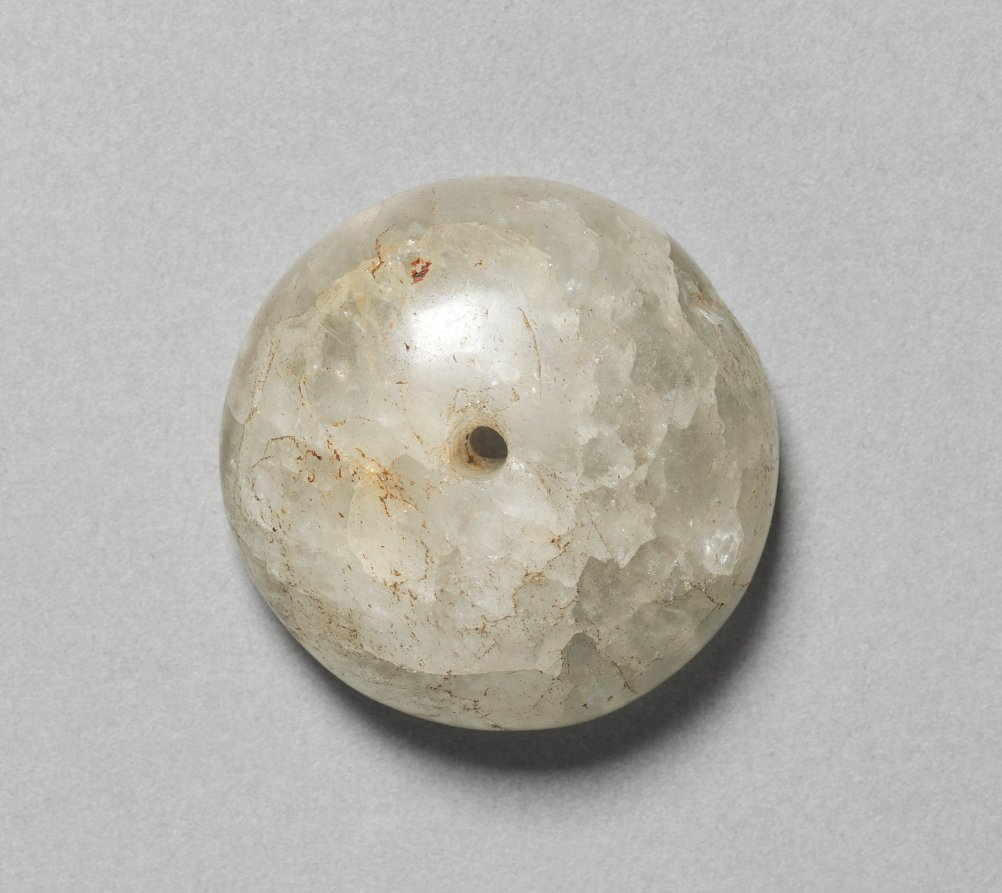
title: Bead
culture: Korea, Unified Silla period (676-935)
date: 700s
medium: glass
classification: Jewelry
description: An enormous amount of beaded strings and necklaces were excavated from Silla tomb sites. Glass, largely produced in ancient Rome since the late first century CE, also reached the Korean peninsula via the Silk Road, the ancient global trade route. Yet this glass bead is highly likely to be soda glass produced in the Silla territory.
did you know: Glass, largely produced in ancient Rome since the late first century CE, reached the Korean peninsula via the Silk Road, the ancient global trade route. This glass bead is very likely to be a local product inspired by the imported Roman glass products.